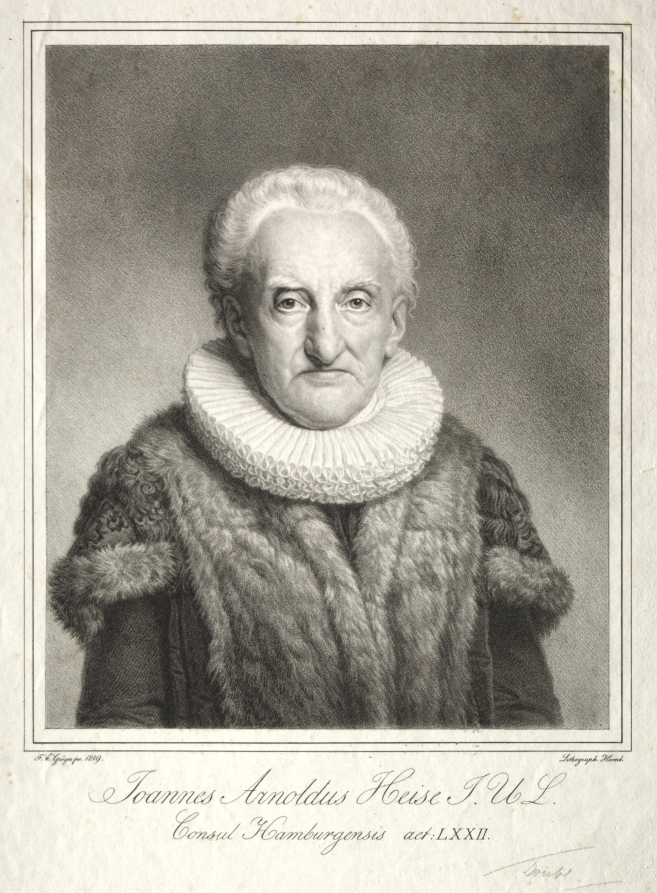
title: Johann Arnold Heise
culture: Germany, 19th century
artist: Friedrich Carl Gröger (German, 1766–1838)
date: 1819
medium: lithograph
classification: Print